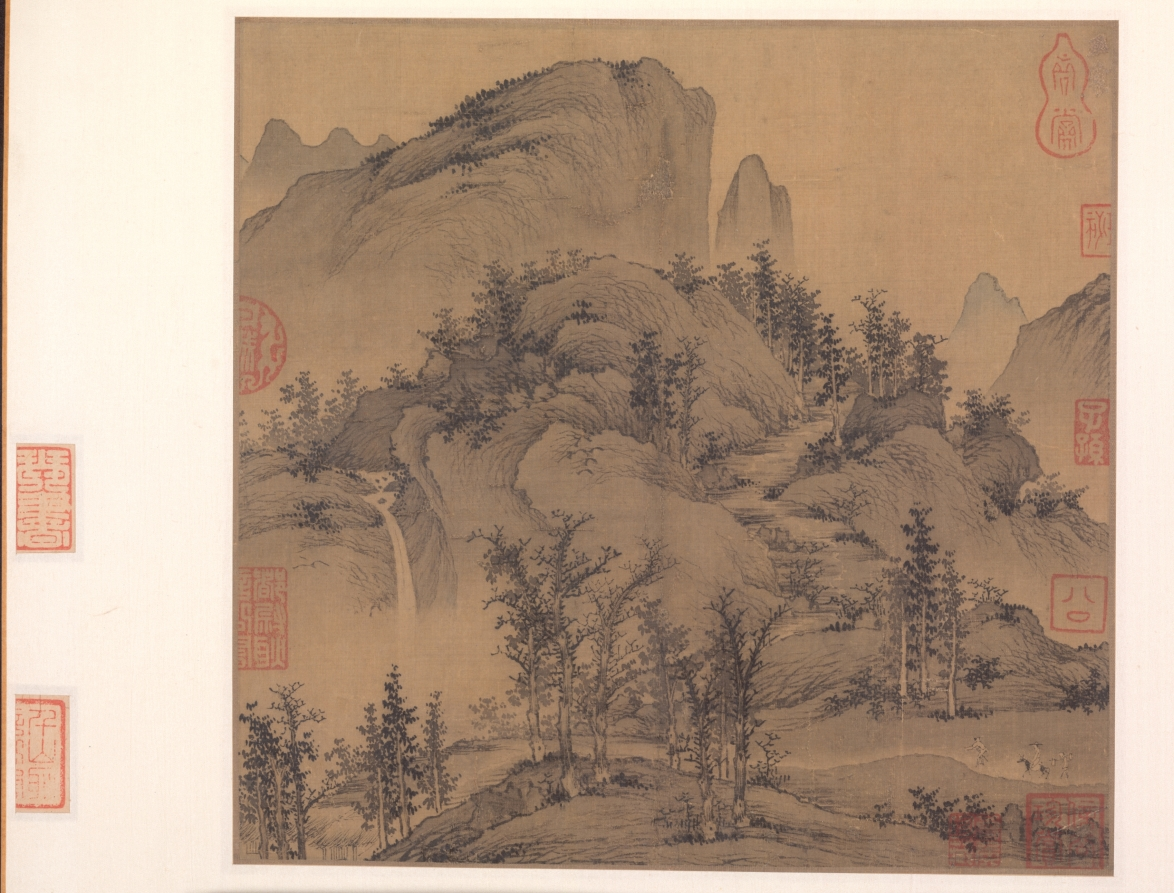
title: Travelers in Autumn Mountains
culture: China, Yuan dynasty (1271-1368)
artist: Sheng Mou (Chinese, active c. 1310–1350)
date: 1300–50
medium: album leaf; ink and slight color on silk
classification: Painting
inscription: 盛 ?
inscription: 10 collectors' seals: 8 of Geng Zhaozhong 耿昭忠 (1640-1686); 2 of Geng Jiazuo 耿嘉祚 (late 1600s-early 1700s), son of Geng Zhaozhong.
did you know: Most of the signature of the artist has been scraped away, so that only the character "Sheng" is legible.